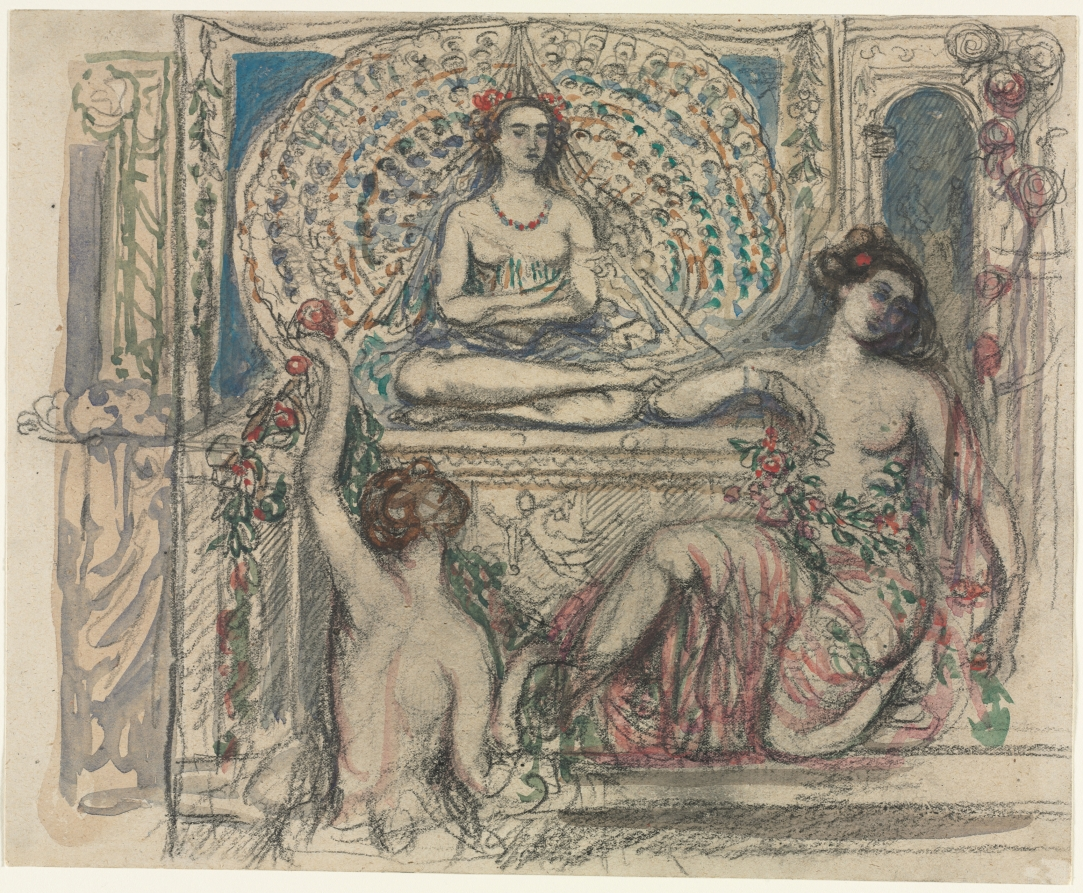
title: The Throne of the Peacock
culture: England, 19th century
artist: Charles Conder (British, 1868–1909)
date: c. 1888–1909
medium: graphite with wash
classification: Drawing